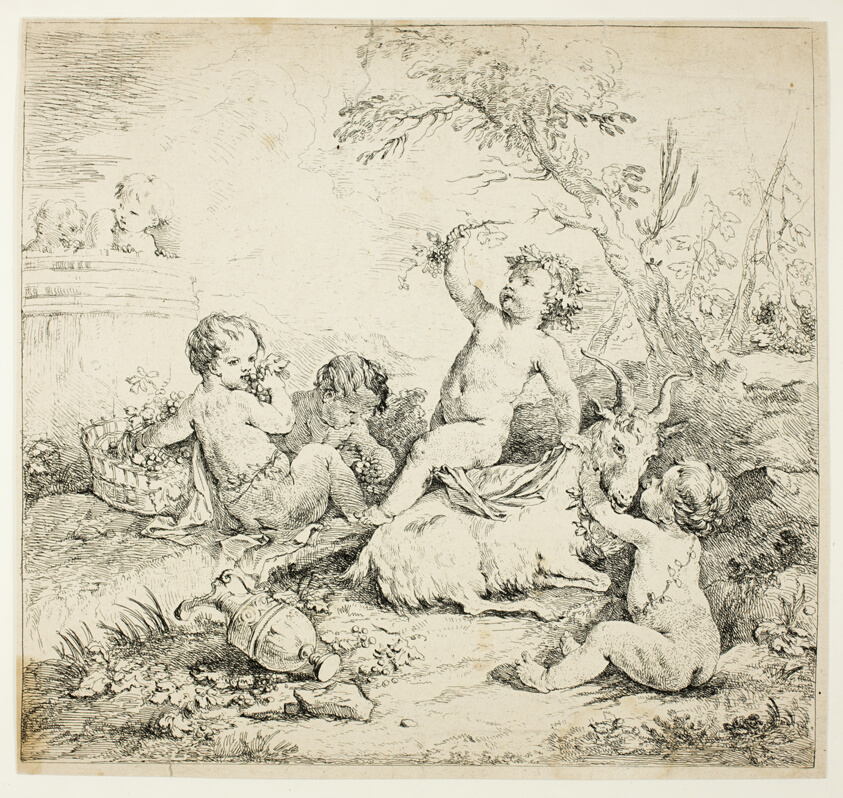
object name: Print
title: Cherubs with a Goat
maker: Charles-Joseph Natoire (French, 1700-1777)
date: 1735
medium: Etching on buff laid paper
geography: France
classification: etching; print; prints and drawing